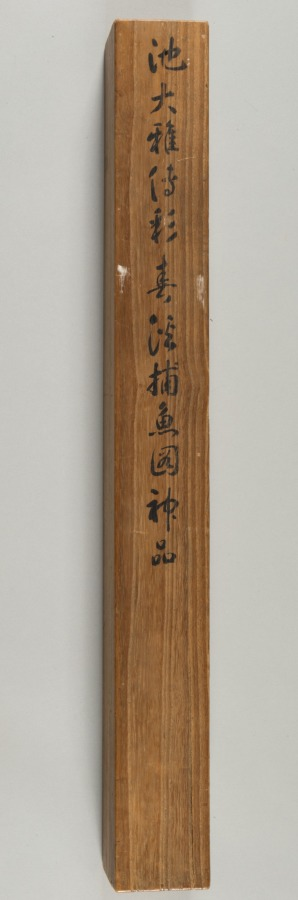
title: Fishing in Springtime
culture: Japan, Edo period (1615–1868)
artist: Ike Taiga (Japanese, 1723–1776)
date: 1700s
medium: Hanging scroll; ink and color on silk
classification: Painting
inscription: Signature: 霞樵, transliteration, Kashō; seals: 池無名印, transliteration, Ike Mumei in; 三岳道者, transliteration, Sangaku Dōja; 遵生, transliteration, Junsei.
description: Ike Taiga was subject to many artistic influences; we know he practiced Zen calligraphy from an early age, his father may have had ties to the famous painter Ōgata Kōrin (1658–1716), he may have trained under a Tosa school painter, and he is thought to have seen Western images early on that informed his approach in representing depth. Though he started with professional beginnings—making a living after his father’s death by selling paintings on fans—he surrounded himself with the members of the literati community, and never stopped absorbing stylistic influences from diverse sources throughout his career. As a result, his style is unique and aesthetically definitive of nanga—the name given to Japanese literati painting.